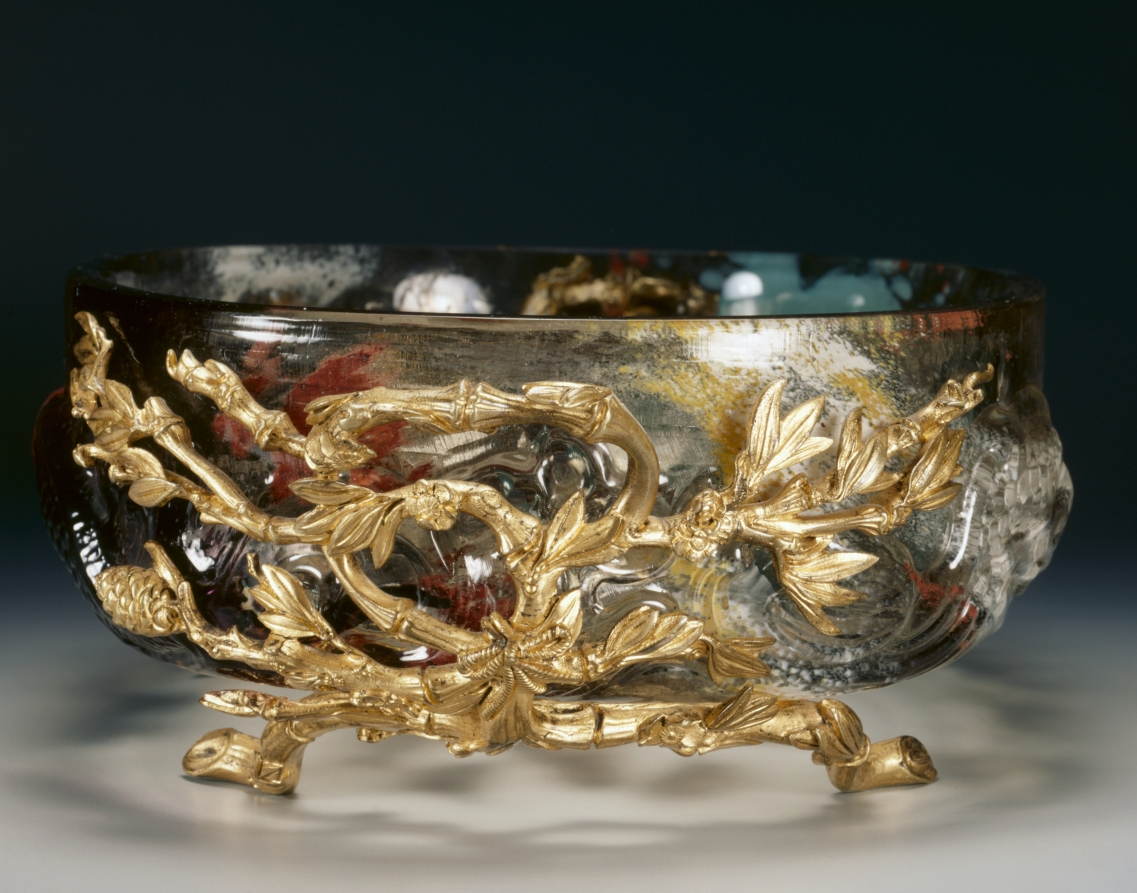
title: Centerpiece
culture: France, Paris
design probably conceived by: Eugène Rousseau (French, 1827–1891)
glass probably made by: firm of Appert Frères (French)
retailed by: firm of Escalier de Cristal (French)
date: c. 1880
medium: glass with gilt metal mounts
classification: Glass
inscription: on underside of glass: Escalier de Cristal. Paris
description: The retail firm of Escalier de Cristal seems not to have directly manufactured the wares they sold, but they exercised design control and sometimes brought together craftspeople of various talents and training to execute their stylish goods. Eugène Rousseau was not himself a craftsman, but he acted as a sort of editor, and glass and ceramics were made under his supervision. The glass of this bowl, with its cast relief decoration and colored inclusions, is of a kind associated with Rousseau. It is known that much of his glass was actually made by the firm of Appert Frères. In terms of style, this Centerpiece reflects the interest in things Japanese, which was an important element in the luxury goods made around 1880. The swimming fish and the naturalistic details of the gilt metal pinecones and twigs tied with string suggest this Asian source of inspiration.